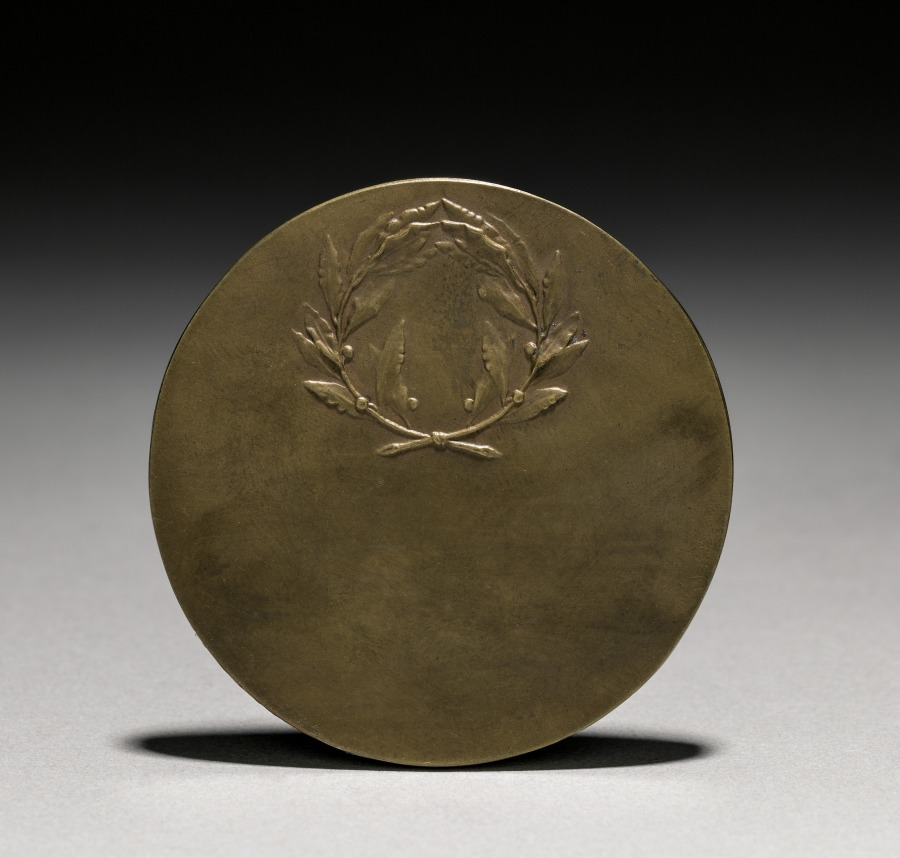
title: Medal of French Republic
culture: France, Early 20th century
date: before 1972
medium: bronze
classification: Metalwork